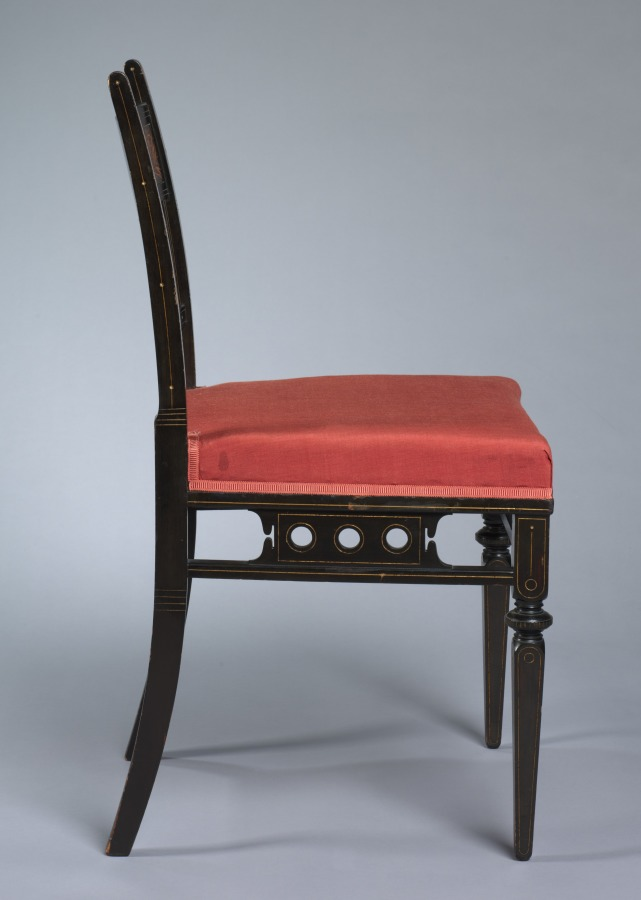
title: Chair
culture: America, New York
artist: Herter Brothers (American)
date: c. 1880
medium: ebonized cherry and other woods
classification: Furniture and woodwork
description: In the 1870s, the furniture made by the Herter firm was influenced by Japanese style, as seen in the marquetry at the top of this chair. It closely resembles one that was supplied for use in the Red Room of the White House in the redecoration of 1882–83.